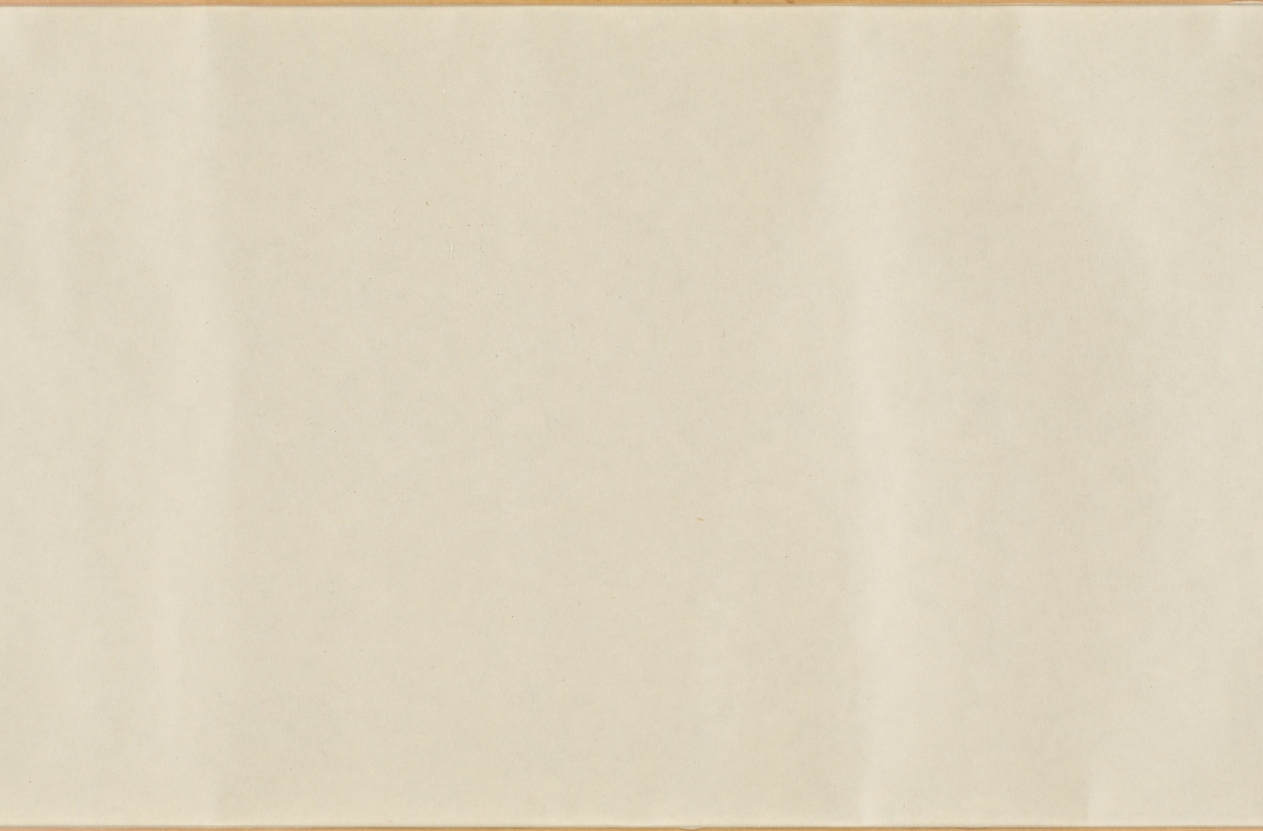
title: Selections from the New Collection of Japanese Poems from Ancient and Modern Times (Shinkokin wakashū) with Printed Designs of Chinese Lions and Crab Finger Grass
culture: Japan, Edo period (1615–1868)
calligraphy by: Hon'ami Kōetsu (Japanese, 1558–1637)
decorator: Tawaraya Sōtatsu (Japanese, c. 1570–c. 1640)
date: early 1600s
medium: handscroll; ink, gold, and silver on paper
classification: Calligraphy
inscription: Seal: 光悦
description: Hon’ami Kōetsu was a calligrapher and craftsman who frequently collaborated with the painter Tawaraya Sōtatsu, considered the first master of the Rinpa school. Kōetsu brushed seven poems from the autumn section of a poetry anthology onto dyed paper with motifs designed and printed in gold and silver by Sōtatsu.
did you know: Before becoming a master painter of screens, Tawaraya Sōtatsu painted fans.